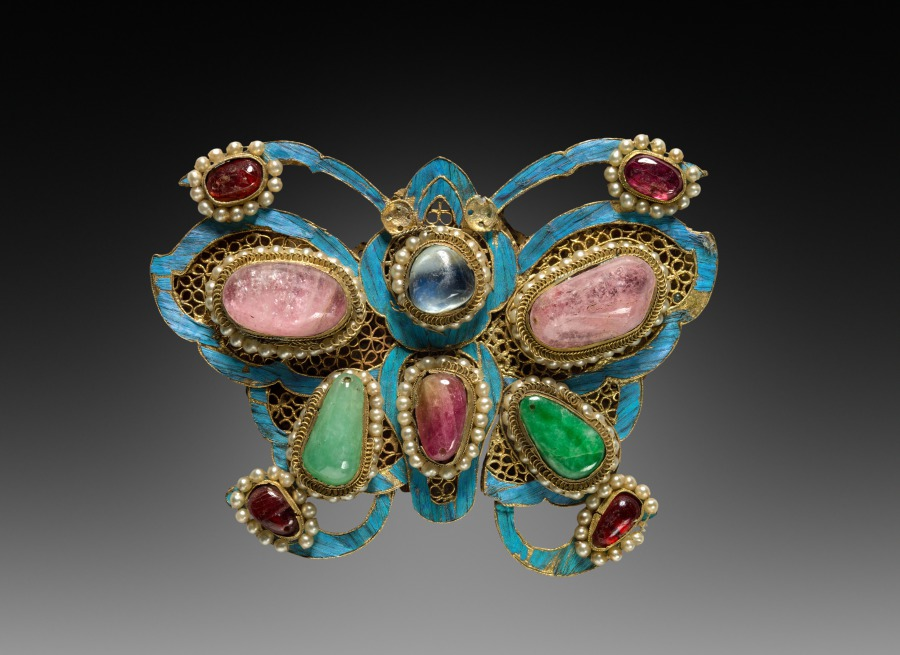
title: Buckle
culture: China, Qing dynasty (1644-1911)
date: 1900s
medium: Gilt-silver inlaid with semiprecious stones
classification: Jewelry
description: This buckle has a silver gilt base with kingfisher feather inlay work and is set with semiprecious stones.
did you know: From the back, you can see that the buckle has two interlocking parts.